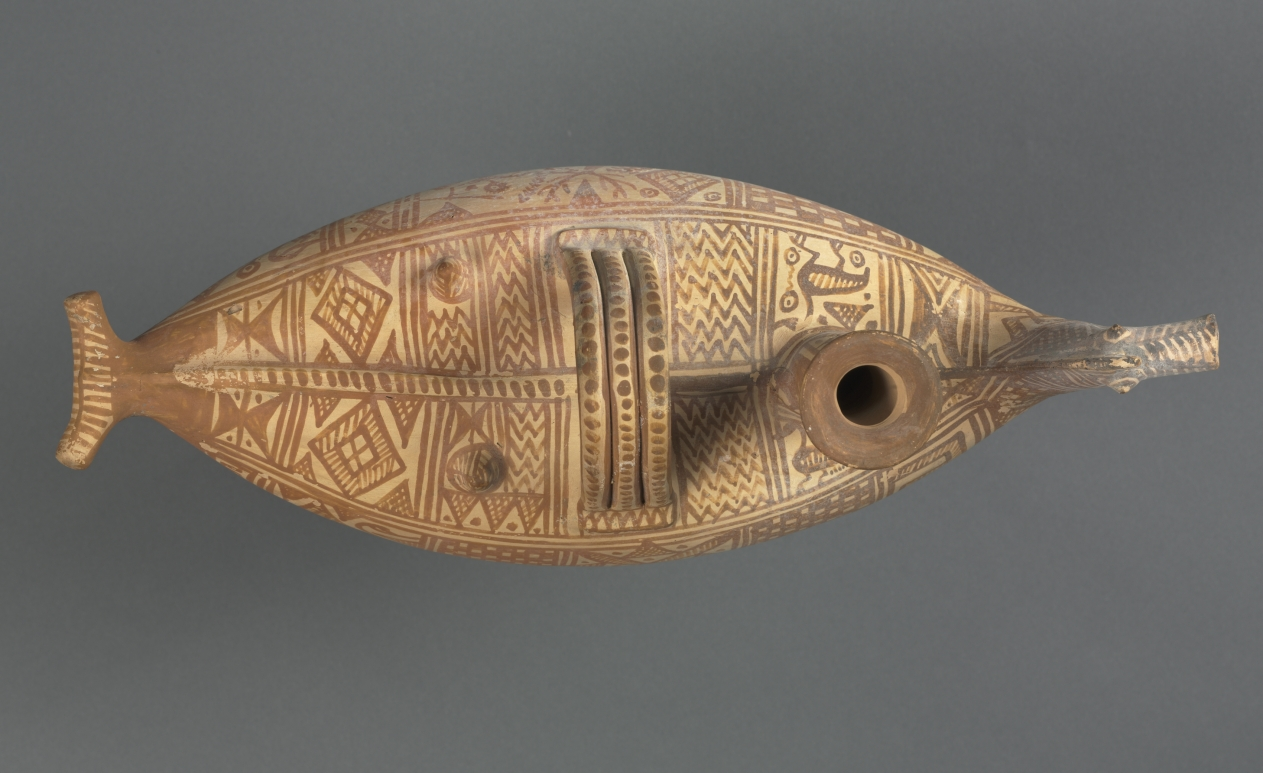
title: Italo-Geometric Bird Askos (Oil Vessel): Hunter (Herakles?) and Stag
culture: Etruscan, likely made at Vulci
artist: attributed to Bisenzio Class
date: c. 700 BCE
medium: ceramic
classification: Ceramic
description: This bird-shaped askos (oil vessel), with a tall filling spout and a pierced beak for pouring, perhaps held perfumed oil for a funerary function. Although the shape likely stems from Italian tradition, the abundantly painted geometric decoration, covering nearly every available surface, derives originally from Greece. Thus scholars have suggested that an immigrant Greek potter working in Etruria may have made the vessel. The sole narrative scene shows a man with a spear leading an antlered animal. If not an anonymous hunter, this could be the earliest known representation of the hero Herakles performing his third labor: capturing the golden-antlered Keryneian hind, or female deer.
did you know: This askos may feature the earliest known representation of Herakles's third labor, the Keryneian hind.